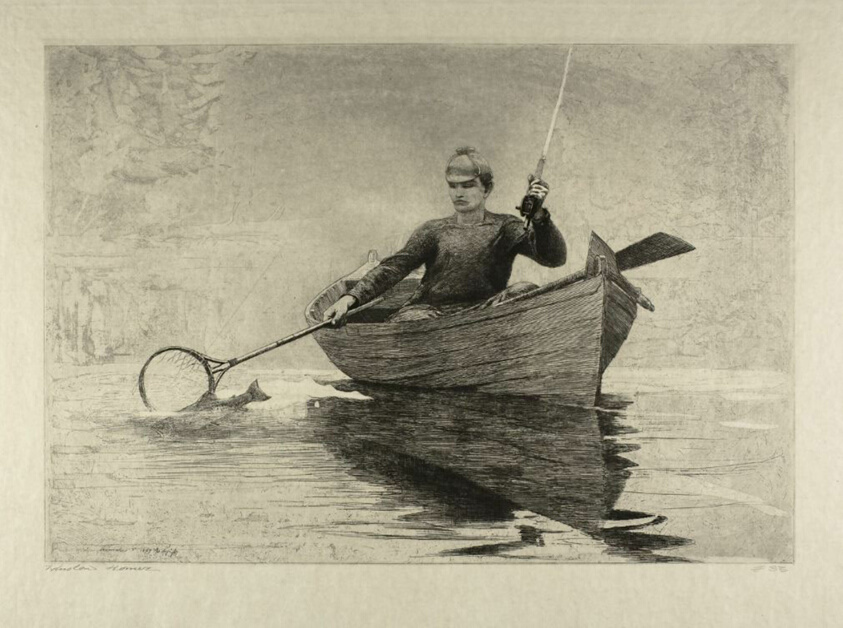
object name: Print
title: Fly Fishing, Saranac Lake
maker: Winslow Homer (American, 1835-1910)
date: 1889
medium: Etching and aquatint with lavis, stopping-out, scraping, and burnishing, on moderately thick, smooth, cream simulated Japanese vellum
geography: United States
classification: etching; paper; print; prints and drawing